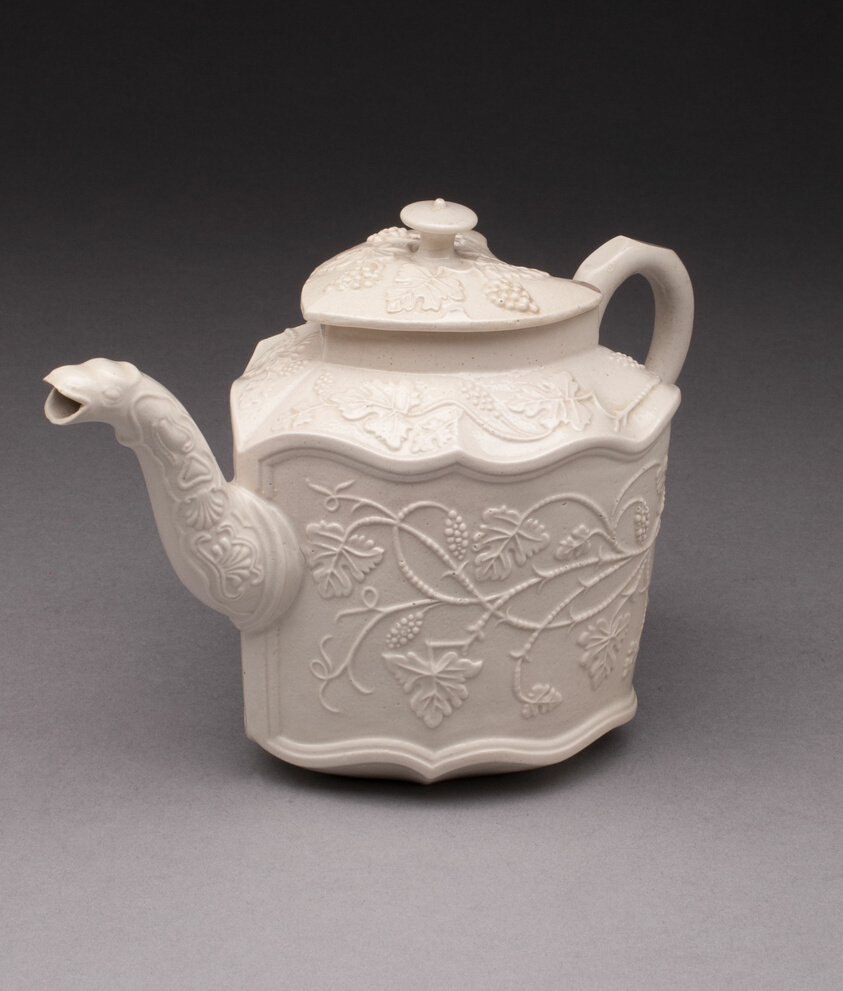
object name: Ceramics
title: Teapot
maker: England, Staffordshire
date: 1750/59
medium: Salt-glazed stoneware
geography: Staffordshire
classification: teapot; stoneware; european decorative arts; ceramics; salt-glazed stoneware